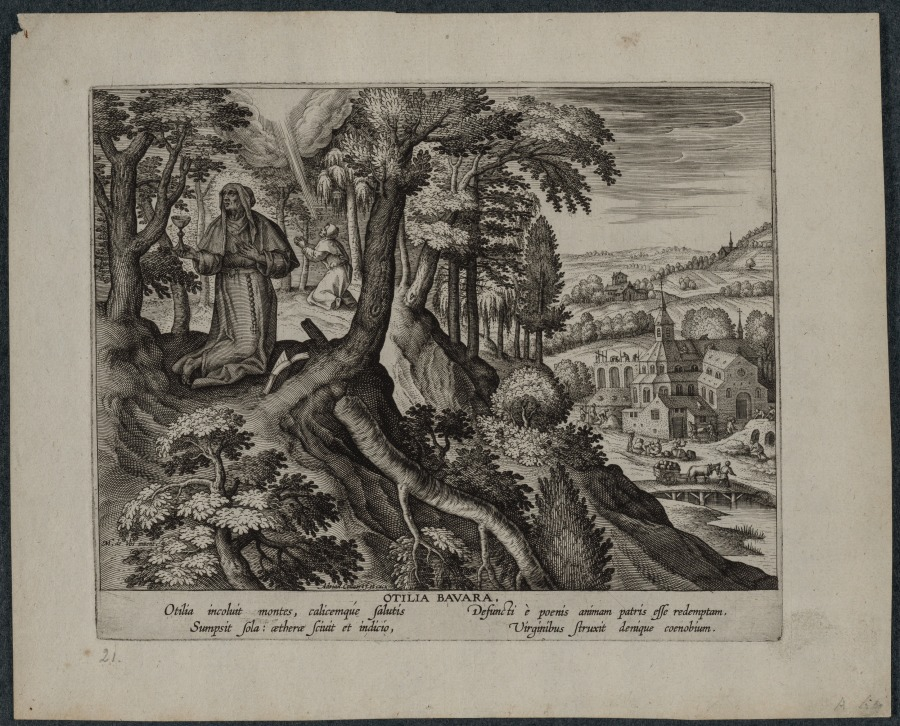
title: Otilia Bavara (Saint Otilia of Bavaria)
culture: Flanders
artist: Adriaen Collaert (Flemish, 1560–1618)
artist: after Maarten de Vos (Flemish, 1532–1603)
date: c. 1580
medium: engraving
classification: Print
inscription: lower margin, in graphite: 21